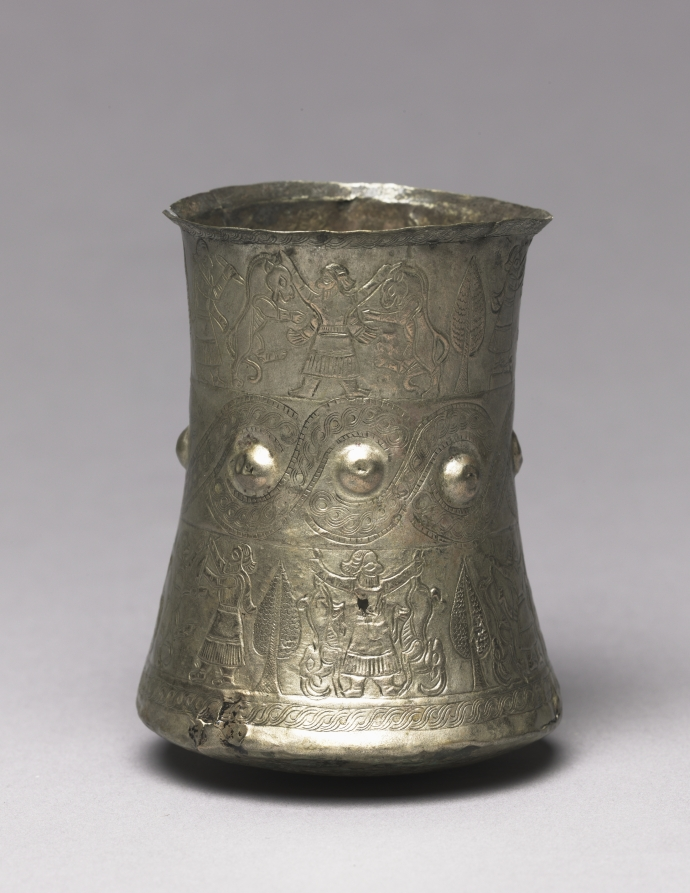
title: Hero and Animal Combat Beaker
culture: Iran, Luristan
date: 900–700 BCE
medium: silver, repoussé, engraved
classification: Metalwork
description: On this silver beaker, two registers show men grabbing felines by the paws and stabbing rearing beasts amid stylized trees. The bearded men wear long robes and scarves, carefully created using repoussé. A large guilloche pattern (interlacing curved lines) containing a smaller guilloche pattern and punctuated by round bosses fills the space between the registers. This beaker may show a Master of Animals or a hero in combat, popular motifs in the ancient Near East.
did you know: Repoussé is a technique of hammering into metal to create designs and figures.